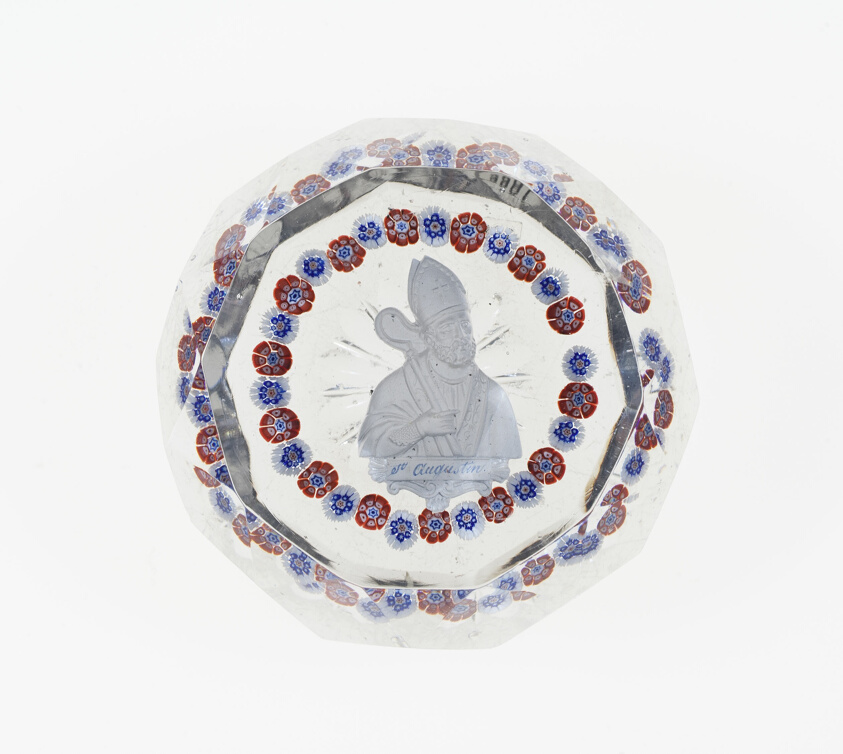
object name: Glass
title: Paperweight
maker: Baccarat Glassworks (Cristalleries de Baccarat); Lorraine, France, founded 1764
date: Mid 19th century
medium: Glass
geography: Baccarat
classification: paperweight; glass